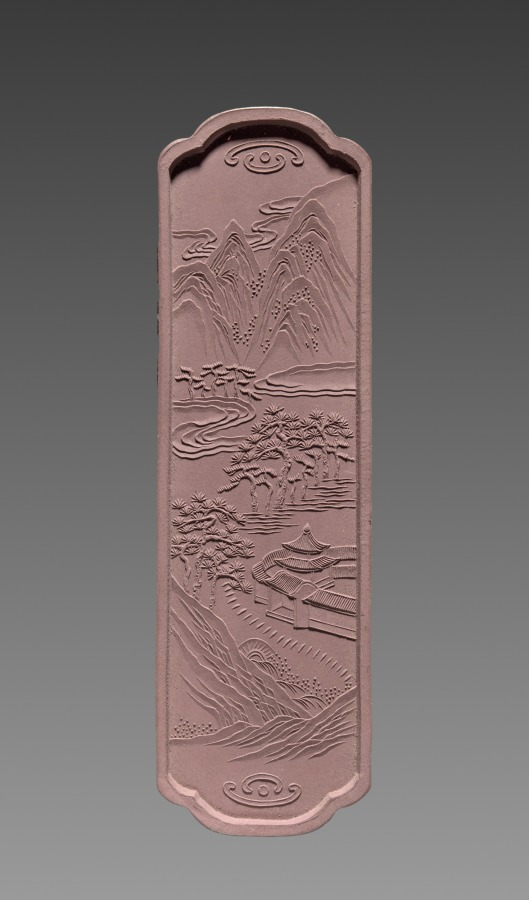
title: Ink Stick from an Imperially Commissioned Set of Ink Stick with Images and Poems of Famous West Lake Sites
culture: China, Qing dynasty (1644–1911), Qianlong reign (1736–95)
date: 1780–94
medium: Molded ink in brown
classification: Miscellaneous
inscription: 乾隆年製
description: This is one of ten ink cakes of different shapes and colors stored in an exquisite lacquer box. Each is inscribed in gold with a poem by the Qianlong emperor, praising the ten famous sights of the Westlake in Hangzhou, near Shanghai. The Westlake is famous for its natural beauty; it was a favorite imperial destination and remains a tourist attraction today. Ink cakes (also called ink sticks) are dissolved with the addition of water and ground on the surface of a flat stone into liquid ink for painting and calligraphy. The precious ink cakes here, however, have never been used.